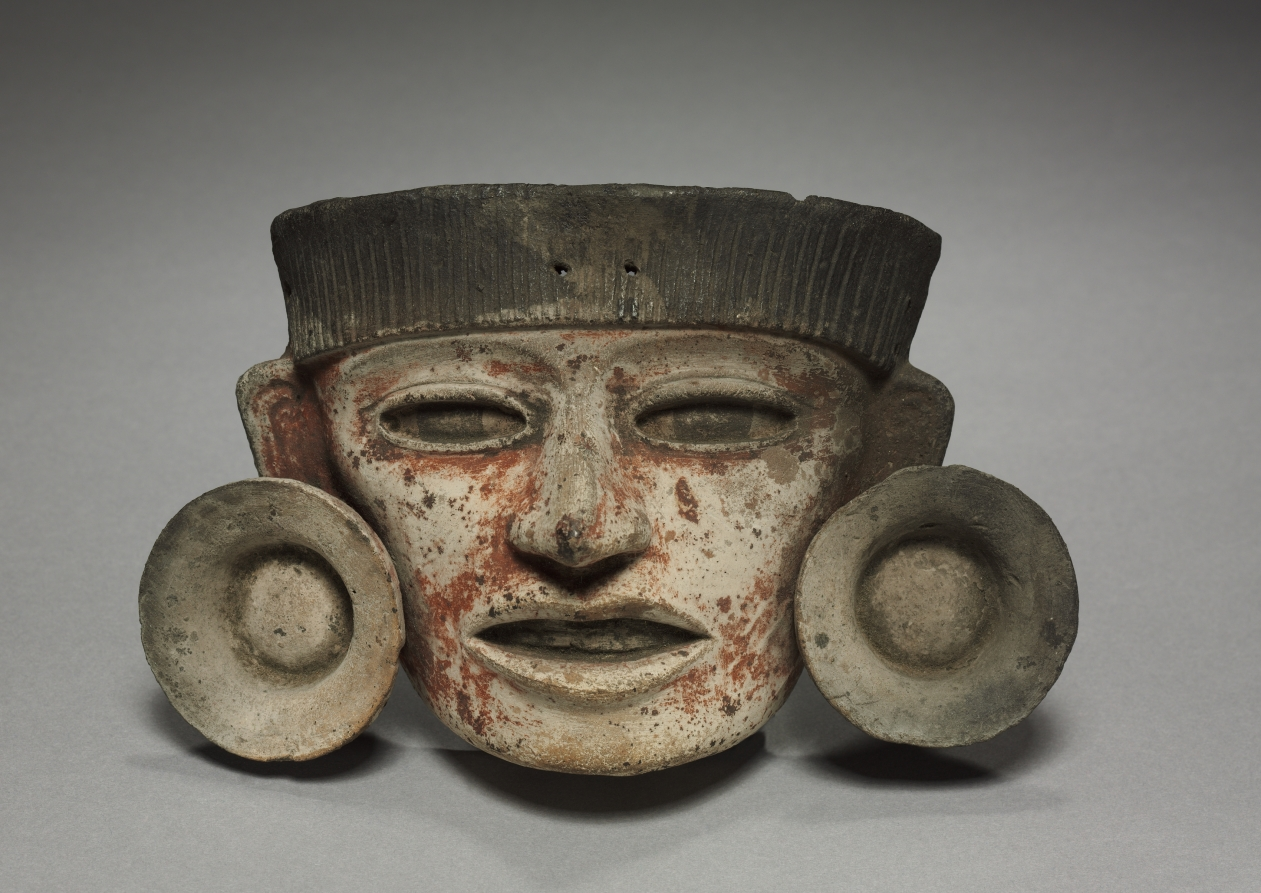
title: Mask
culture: Central Mexico, Teotihuacán, Classic period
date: 1–550 CE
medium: ceramic, slip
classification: Ceramic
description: Many Teotihuacán masks were once tied to something via holes on the back--perhaps a body-shaped form dressed in garments, ornaments, and a headdress that identified the figure. The stone masks’ eyes and mouths once held inlays representing irises, pupils, and teeth.